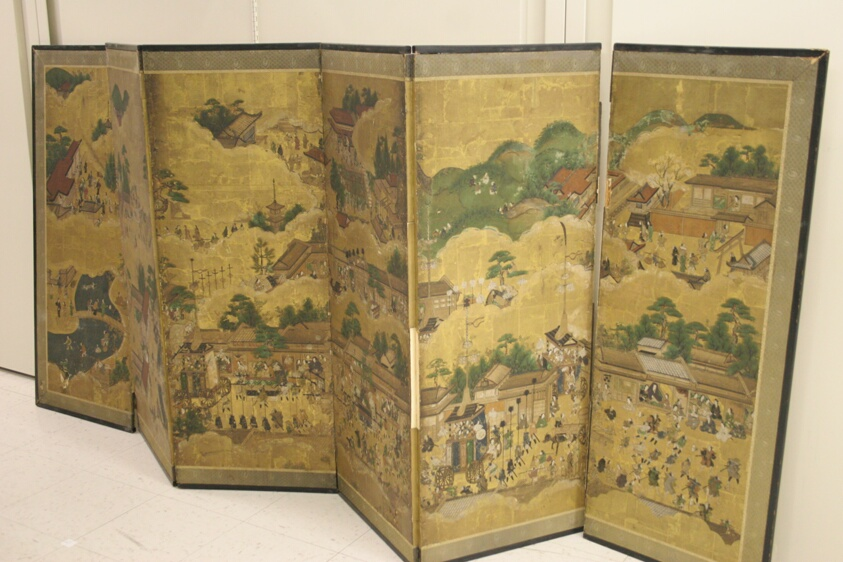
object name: Painting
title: Festival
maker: Artist unknown (Japanese, 18th century)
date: c.1800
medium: Six-panel screen; ink, colors, gold on paper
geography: Japan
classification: asian art; painting; screen